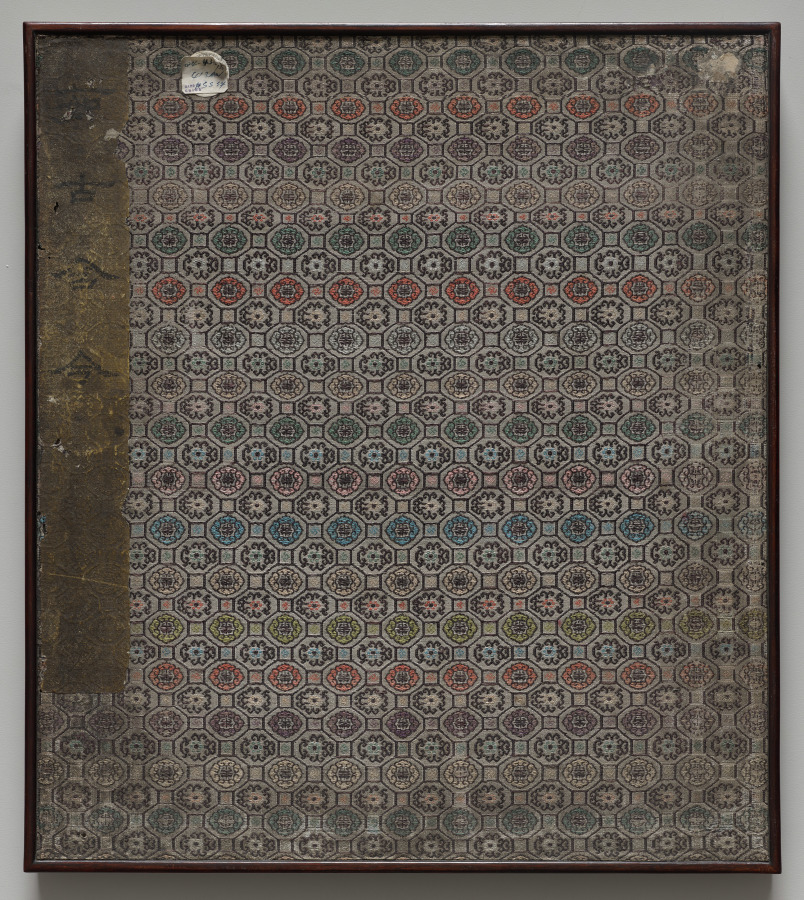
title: Absorb the Past; Abandon the Present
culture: China, Qing dynasty (1644–1911)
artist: style of Qian Hui'an (Chinese, 1833–1911)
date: 1800s–1900s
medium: Accordion-style album of 10 painted leaves; ink and color on silk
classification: Painting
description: Qian Huian, active in Shanghai, was best known for his paintings of beautiful women, and historic and mythological figures, rendered in a distinct style. His figures appear eccentric and the color palette pale to pink. The album’s title, Absorb the Past, Abandon the Present, reflect the desire to find refuge in China’s Past, as the country was going through the devastating Taiping rebellion at the time the paintings were created.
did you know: Leaf four depicts Tao Yuanming, carried by servants in a basket as he had an ailing foot. Tao wrote the Peach Blossom Spring tale, in which a fisherman loses his way and ends up in a utopia.